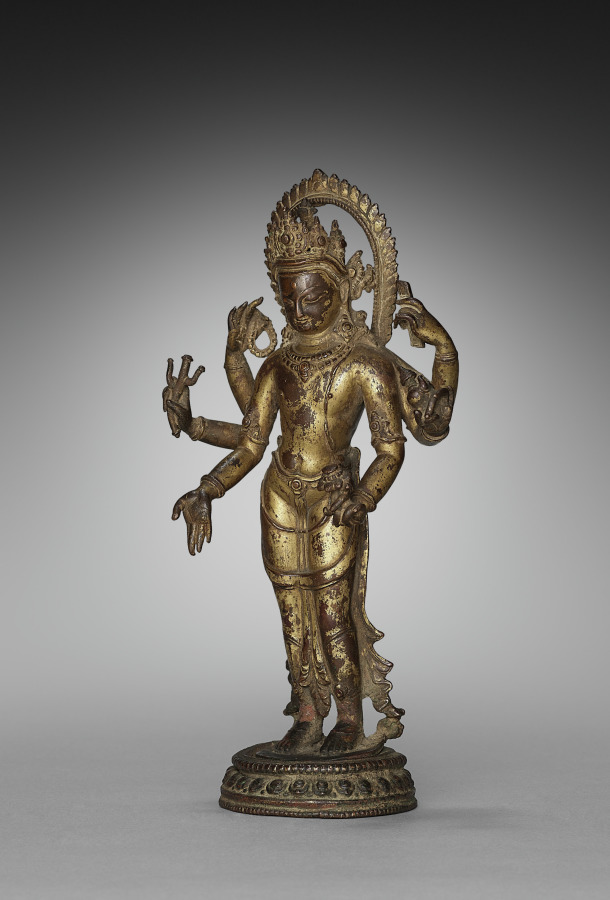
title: Lokeshvara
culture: Nepal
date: 1300s–1400s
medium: gilded copper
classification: Sculpture